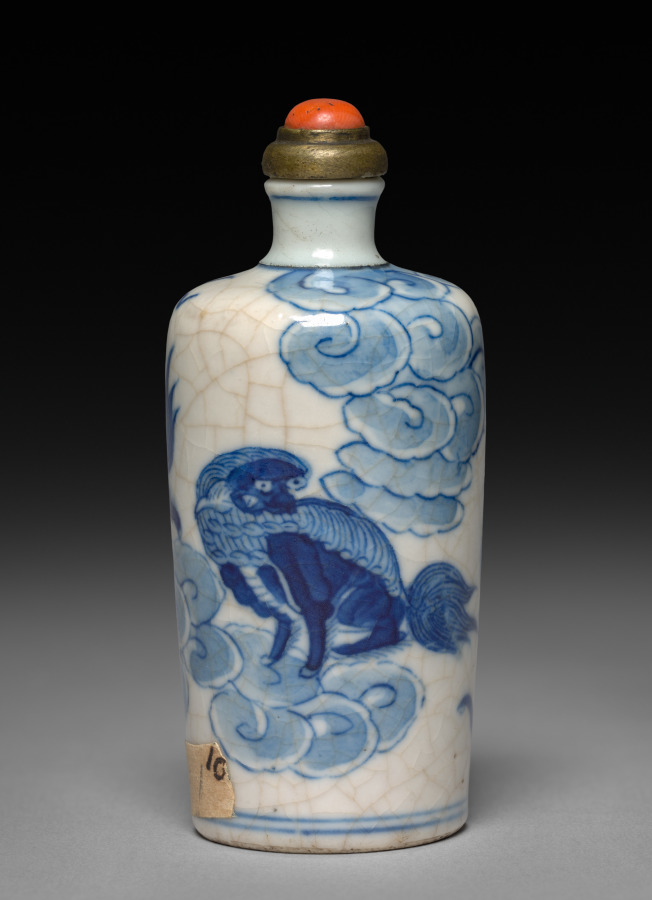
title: Snuff Bottle with Stopper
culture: China, Jiangxi province, Jingdezhen kilns, Qing dynasty (1644-1911), Yongzheng reign (1722-35)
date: 1723–35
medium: porcelain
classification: Ceramic